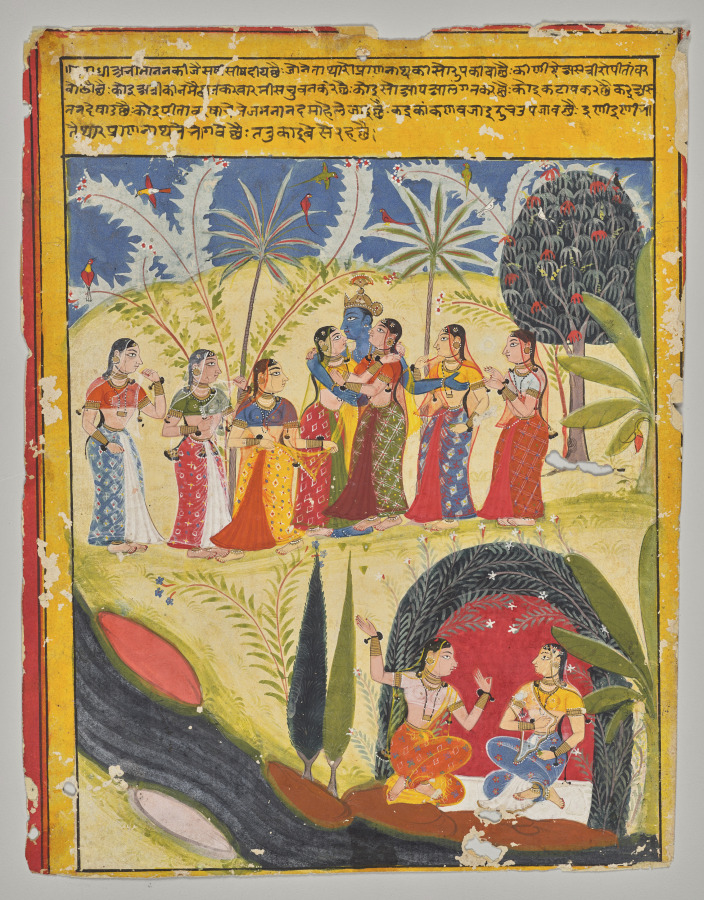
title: Krishna and Gopis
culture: Northwestern India, Rajasthan, Rajput Kingdom of Mewar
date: c. 1660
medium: Gum tempera, ink, and gold on paper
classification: Painting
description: While Radha waits for Krishna in her bower, he is flirting with other women of the cowherding community. Like a fickle lover, sometimes god abandons his devotee and showers blessings on others. Radha's companion comes to bring her the news of Krishna's playful, erotic activities.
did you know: The Yamuna River flows across the bottom of the page.